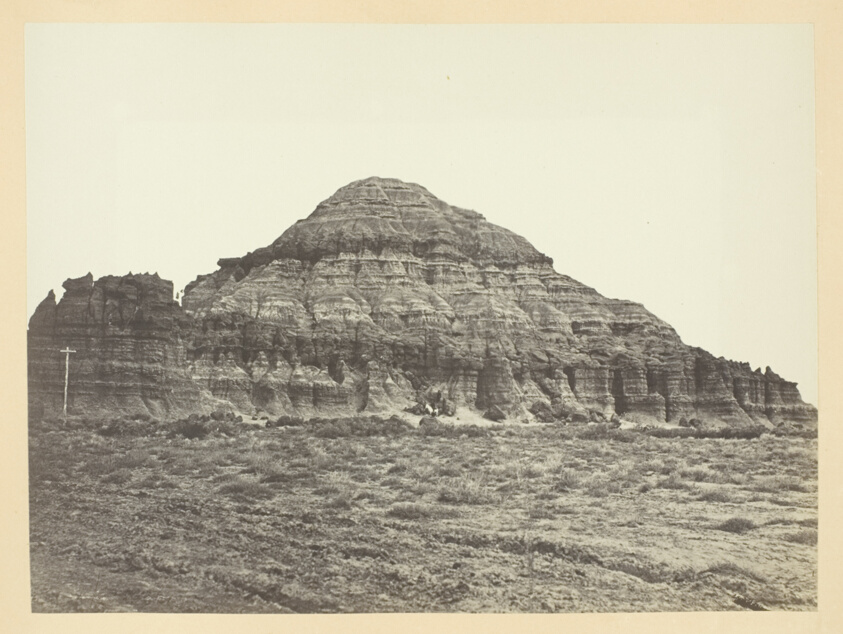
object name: Photograph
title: Church Buttes, Near Fort Bridger, Wyoming Territory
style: 19th century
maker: Andrew J. Russell; American, 1830–1902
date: 1868/69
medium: Albumen print, pl. XIII from the album "Sun Pictures of Rocky Mountain Scenery" (1870)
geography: United States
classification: photograph; albumen silver print; photography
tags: Collected by Hugh Edwards